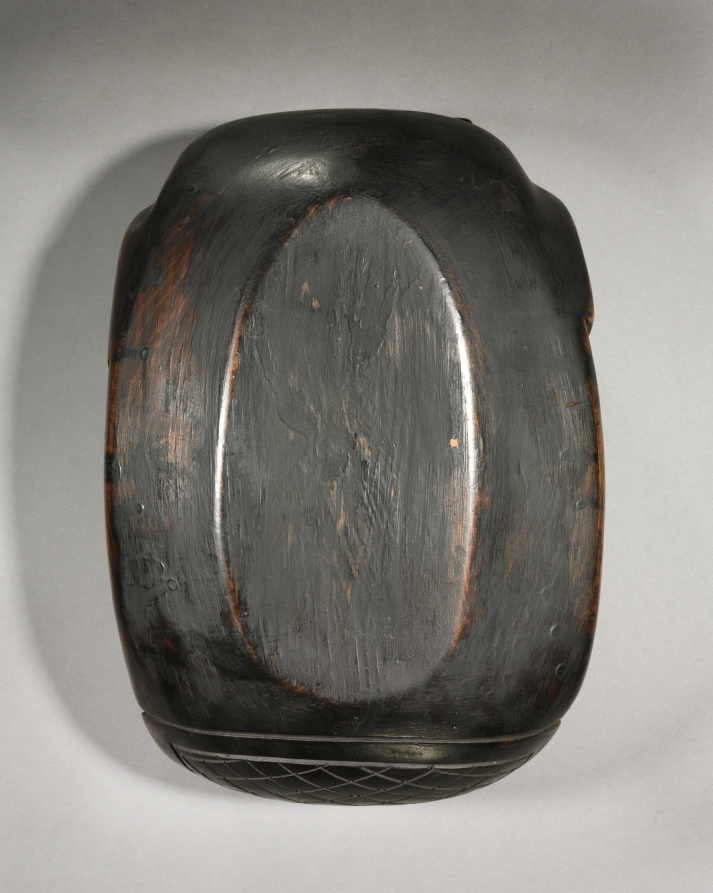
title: Beaver-Shaped Bowl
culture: Native North America, Northwest Coast, Alaska, Tlingit?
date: c. 1890–1920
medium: wood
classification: Wood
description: Bowls were a major Northwest Coast art form, used in many contexts including potlatch feasts that validated the rights and privileges of wealthy noble families. When Euro-American settlement forced a change from traditional to cash economies in the early 1900s, Indigenous carvers turned their skills to creating bowls like this example for the outside market.